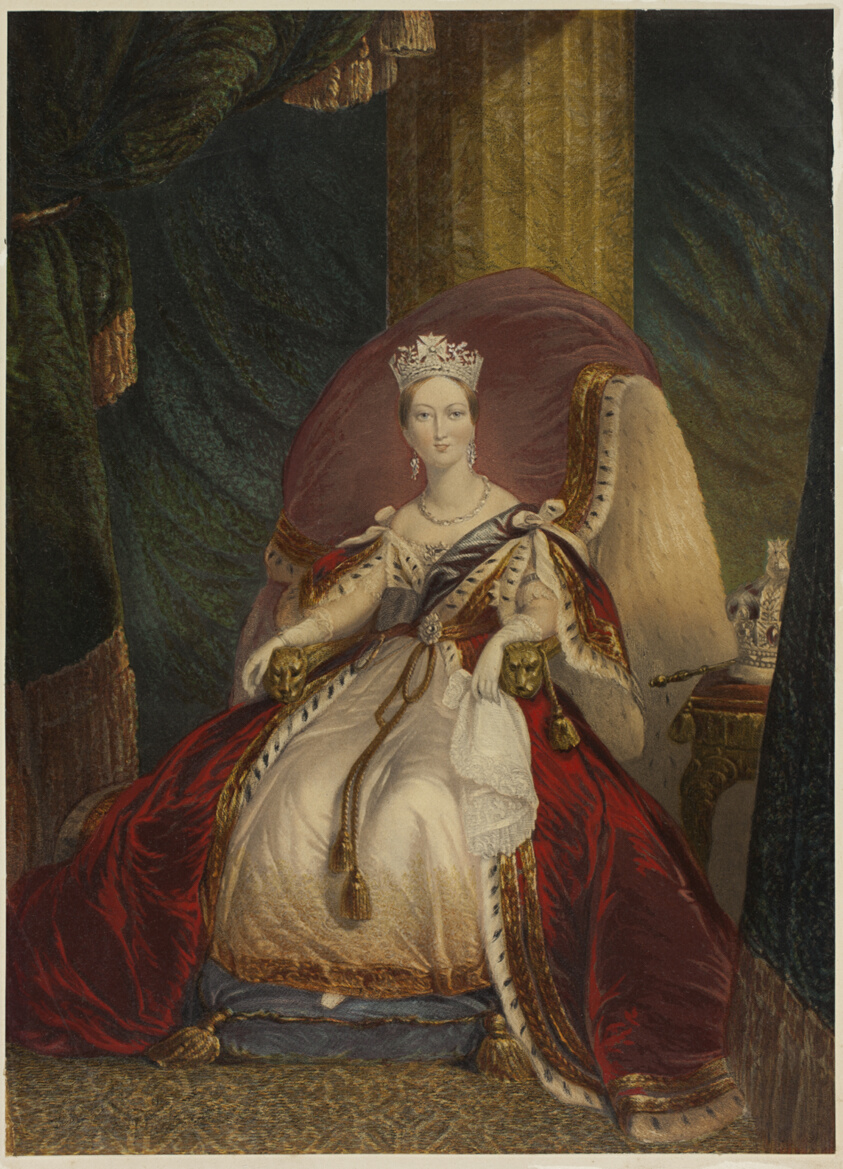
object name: Print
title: Victoria, Queen of Great Britain, India, etc.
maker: George Baxter (English, 1804-1867)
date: c. 1859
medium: Steel engraving colored with wood-blocks in oil-based inks on paper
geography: England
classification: wood engraving; print; prints and drawing